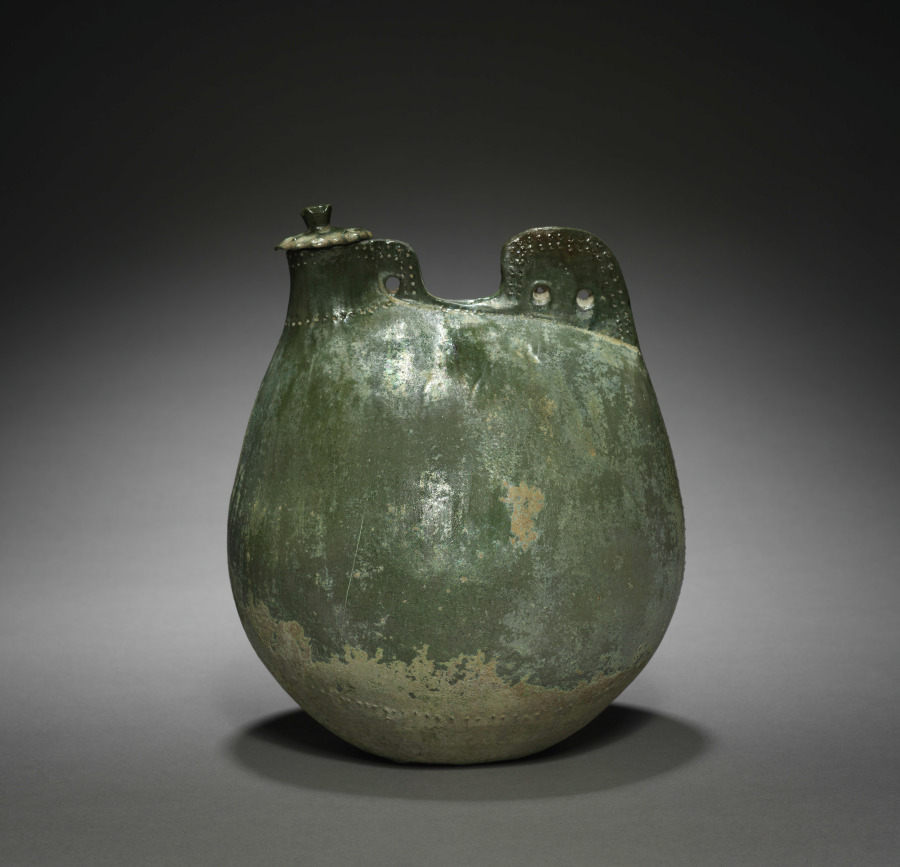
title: Leather Bag-Shaped Flask with Cover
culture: Northeast China, Liao dynasty (916-1125)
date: 916–1125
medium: earthenware with green glaze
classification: Ceramic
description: Flasks like these derive their shapes from leather bags; even the edges are finely rouletted to resemble the seams of sewn leather. These were used by the nomadic Khitan people who established the Liao kingdom in Inner Mongolia, Manchuria, and North China. Such wares represented the Liao adoption of the Tang Chinese ceramic tradition, and yet they expressed ethnic identity and new innovations resulted from the cultural borrowing.